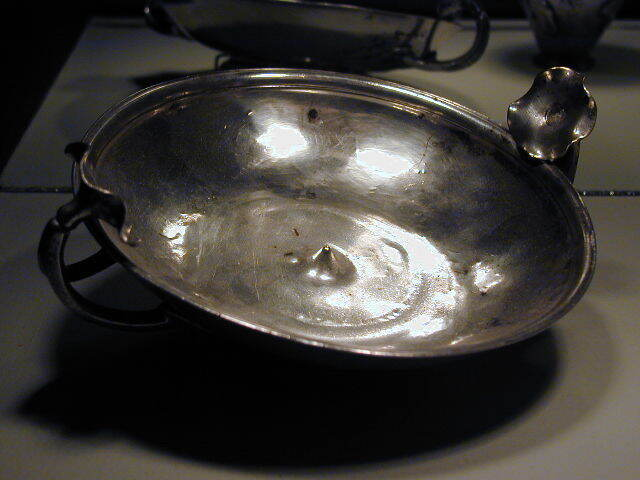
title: Stemless Kylix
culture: Greece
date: c. 200s BCE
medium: silver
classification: Metalwork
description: Constructed out of a double shell of silver attached at the rim of the vessel, this shallow cup is an elegant example of Greek silversmithing. A pair of wishbone handles, one on each side of the cup, are decorated with leaves at their base and poppy flowers on top. A small, pointed dimple projects from the center of the interior. Originally, this cup would have been used as a drinking vessel during banquets.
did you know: Poppies and their derivative, opium, were used in the ancient Mediterranean as an analgesic and to treat insomnia.